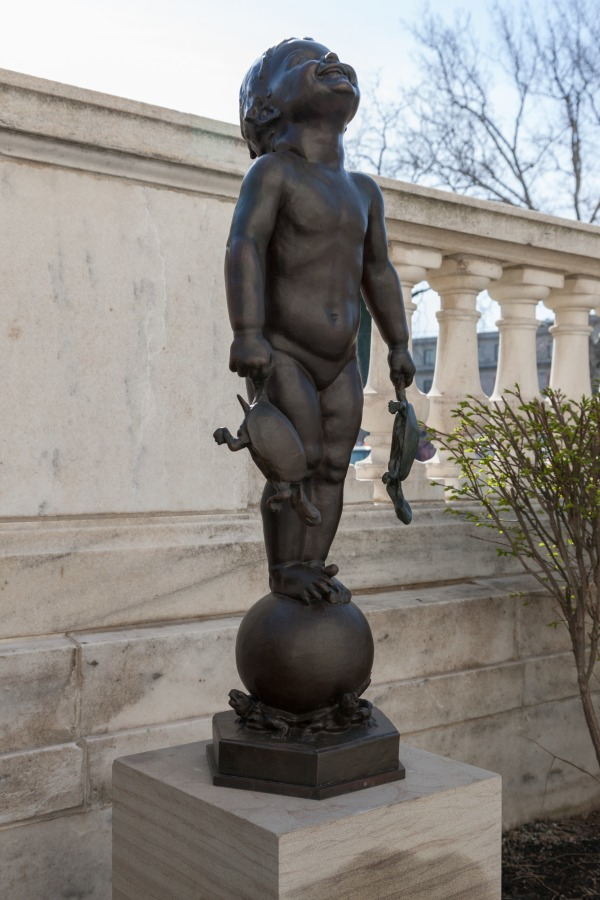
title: Turtle Baby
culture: America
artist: Edith Barretto Stevens Parsons (American, 1878–1956)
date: c. 1910–16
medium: bronze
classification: Sculpture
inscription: Signed on base: E. BARRETTO PARSONS COPYRIGHT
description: Parsons achieved renown through her garden sculptures of young children accompanied by animals, which one commentator praised for capturing “the happiness of just being alive.” In Turtle Baby, her most famous composition, the figure of the girl was modeled after her daughter. Conceived as a fountain, the sculpture has internal water conduits exiting the mouths of the four turtles circling its base.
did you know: Parsons created similar sculptures featuring young girls and boys with ducks, frogs, and fish.